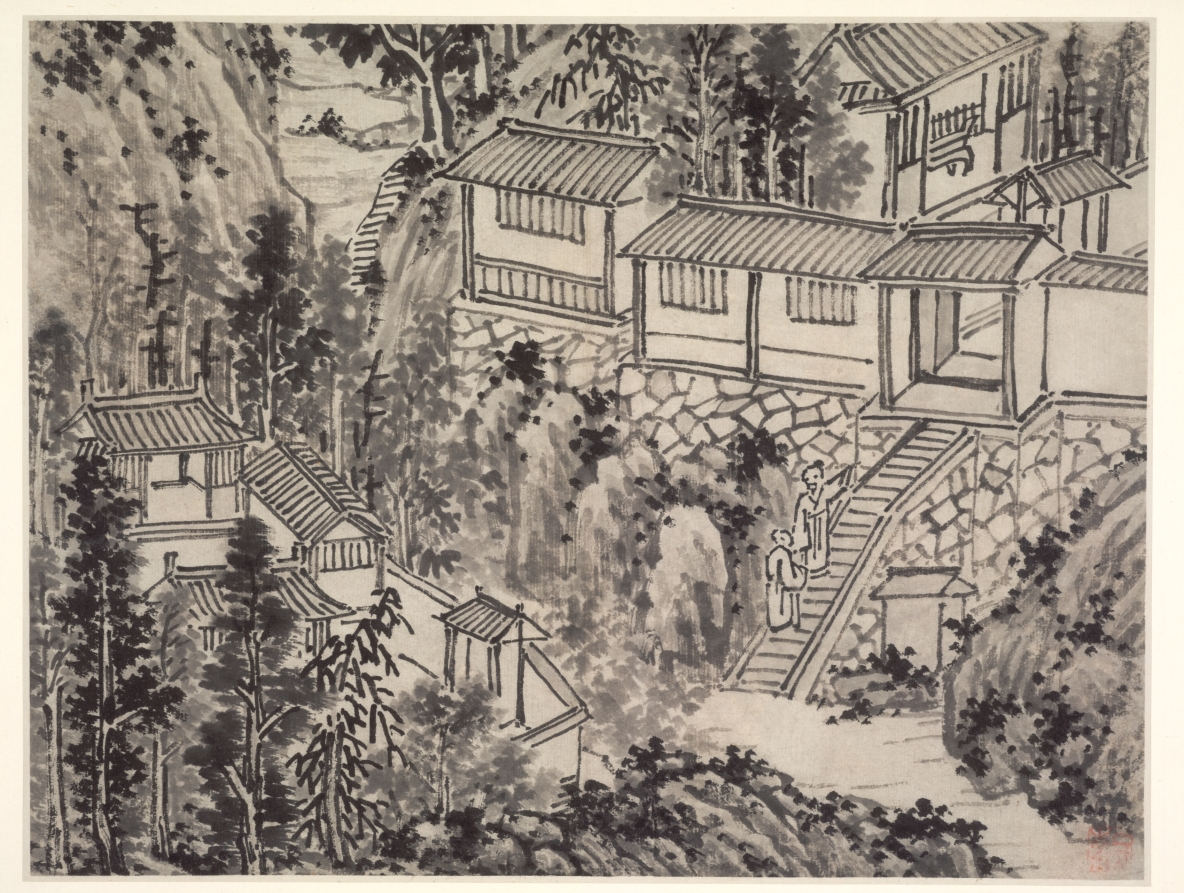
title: The Pine Retreat, from Twelve Views of Tiger Hill, Suzhou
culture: China, Ming dynasty (1368–1644)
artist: Shen Zhou (Chinese, 1427–1509)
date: after 1490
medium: Album leaf; ink on paper or ink and slight color on paper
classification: Painting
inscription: [印] 启南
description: Views of Tiger Hill depicts a historic site a few miles northwest of Suzhou. The scenes simulate a visit from arriving by boat at the foot of the mountain to climbing to Cloudy Cliff Monastery. Representations of the artist’s mature style, Shen Zhou included views in subtle colors in the suite of monochrome scenes. A Suzhou native, Shen Zhou was supported by family wealth and rejected an official career in favor of life as a retired scholar. Turning to painting in midlife, he is regarded as the founder of the Wu School of painting, with its center in Suzhou.